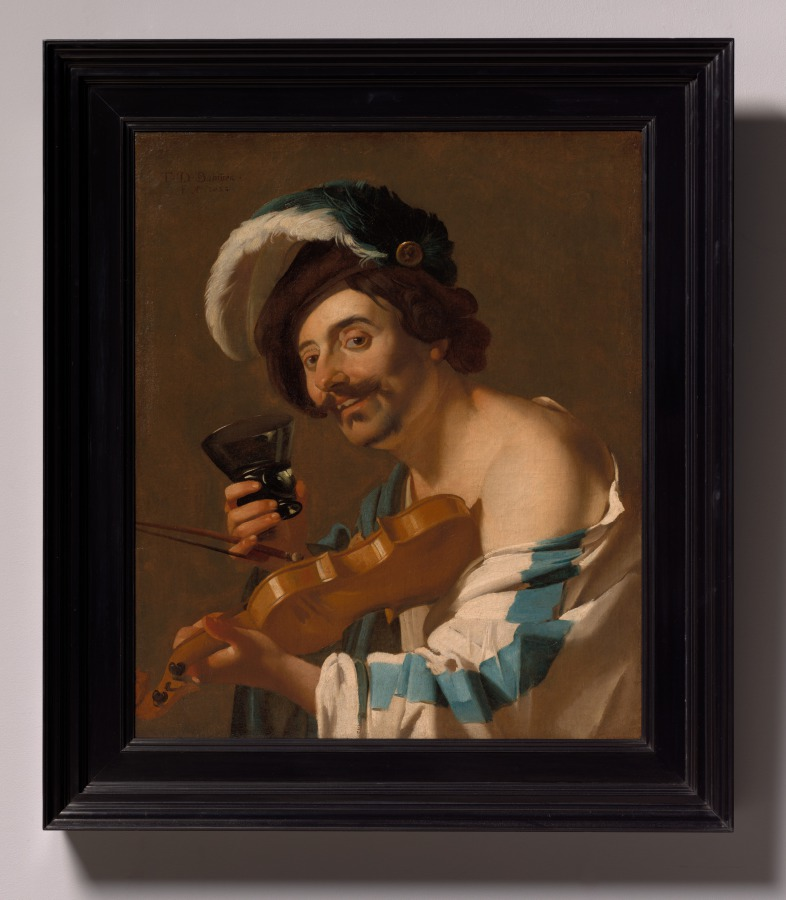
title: Violin Player with a Wine Glass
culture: Netherlands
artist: Dirck van Baburen (Dutch, c. 1595–1624)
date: 1623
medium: Oil on canvas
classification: Painting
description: Baburen, a native of Utrecht, was among the first to introduce Caravaggio’s revolutionary style to the Netherlands. Half-length figures positioned close to the picture plane project a lively spontaneity. This musician’s loose, colorful dress marks him as a figure at the edges of society, unbound by behavioral norms—associations enhanced by his bold gaze, unshaven face, and cheeky grin complete with broken tooth.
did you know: Other paintings by Utrecht artists feature the same model, whose extravagant mustache and broken tooth make him instantly recognizable.